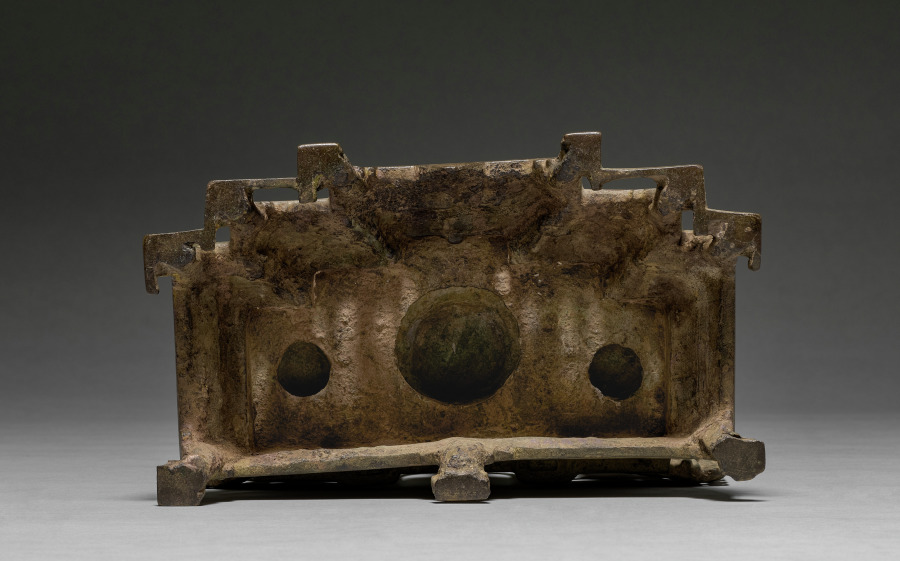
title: Vishnu Attended by Chakrapurusa and Shankhapurusa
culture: East India, Bengal, Pala period, 11th-12th century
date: 1000s–1100s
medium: bronze with silver inlay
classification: Sculpture